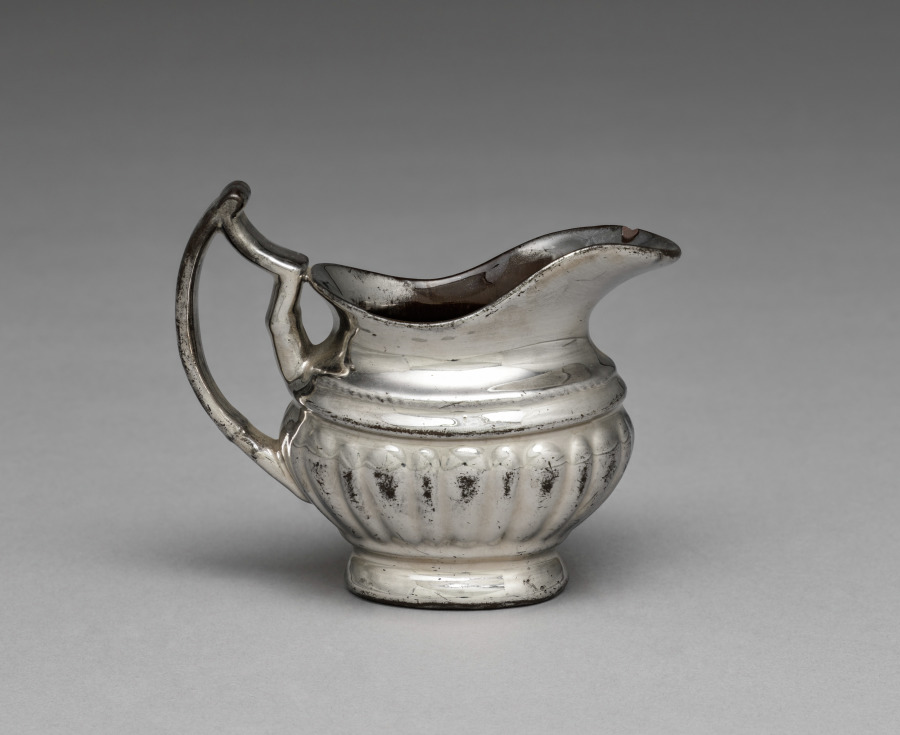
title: Silver Lustre Creamer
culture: England, 19th century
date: 1800s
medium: lustreware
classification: Ceramic